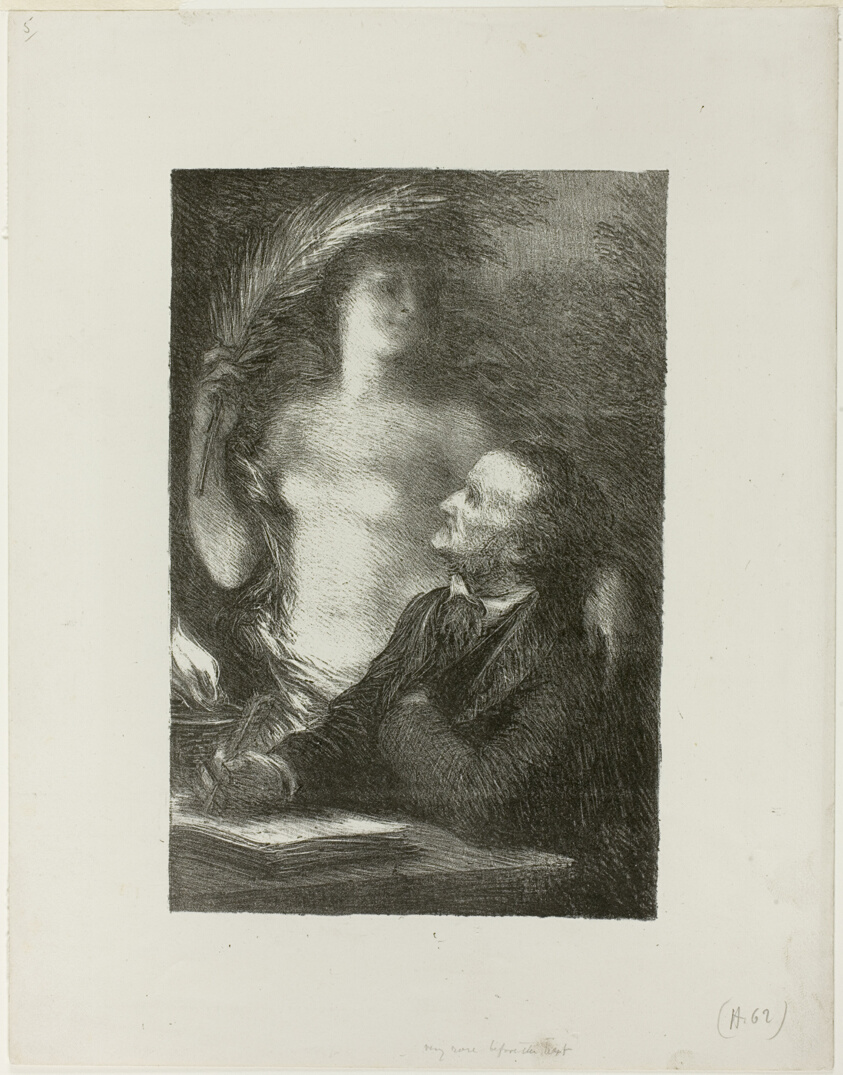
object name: Print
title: The Muse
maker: Henri Fantin-Latour (French, 1836-1904)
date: 1886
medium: Lithograph in black with scraping on stone on ivory wove paper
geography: France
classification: lithograph; print; prints and drawing